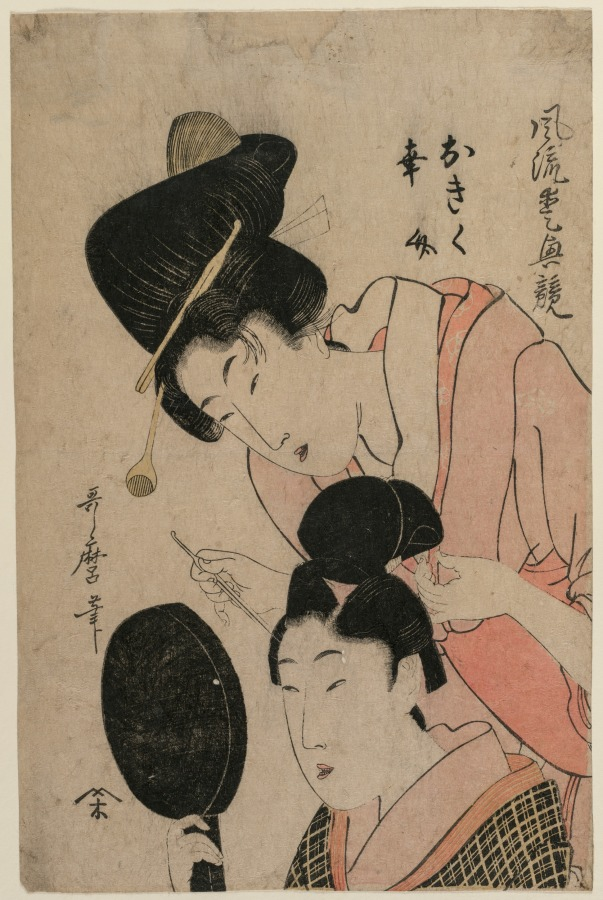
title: The Lovers Okiku and Kozuke (from the series An Elegant Comparison of Charming Features)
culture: Japan, Edo period (1615–1868)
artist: Kitagawa Utamaro II (Japanese, d. 1831?)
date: mid 1800s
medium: color woodblock print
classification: Print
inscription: Signature: Utamaro hitsu